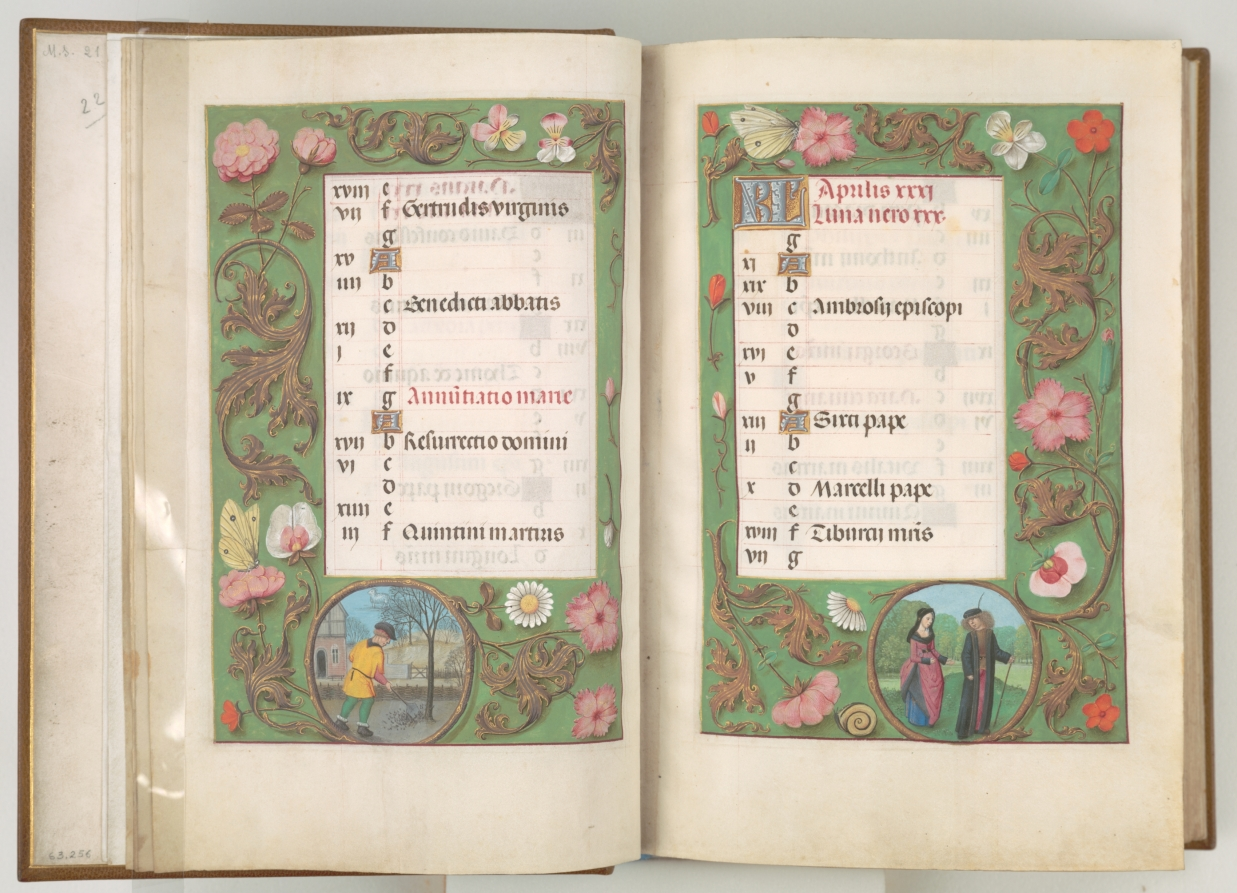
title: Hours of Queen Isabella the Catholic, Queen of Spain: Fol. 5r, April - Squire and Damsel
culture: Flanders, Ghent and Bruges, late 15th century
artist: Master of the First Prayerbook of Maximillian (Flemish, c. 1444–1519)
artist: and Associates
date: c. 1500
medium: ink, tempera, and gold on vellum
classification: Bound Volume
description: This manuscript was illuminated by a circle of at least five highly organized manuscript painters active in the Flemish cities of Ghent and Bruges. The principal illuminator was Alexander Bening, who painted the majority of the book's miniatures. Manuscripts produced by this circle of artists are renowned for the decoration of their borders, which typically feature a rich variety of realistically painted flowers, birds, and butterflies. This prayer book, called a book of hours, was intended not for a cleric but for the private devotions of a lay person—in this case, Isabella the Catholic, Queen of Spain (1451–1504); her coat of arms embellishes the book's frontispiece. It is unlikely that the book was commissioned by the Queen herself; rather, she probably received it as a diplomatic gift from someone courting her patronage, perhaps Cardinal Francisco Jimenez de Cisneros. A Franciscan friar, Jimenez was dependent upon Isabella for his advancement, first to the post of Queen's confessor in 1492, and then to Archbishop of Toledo in 1495.